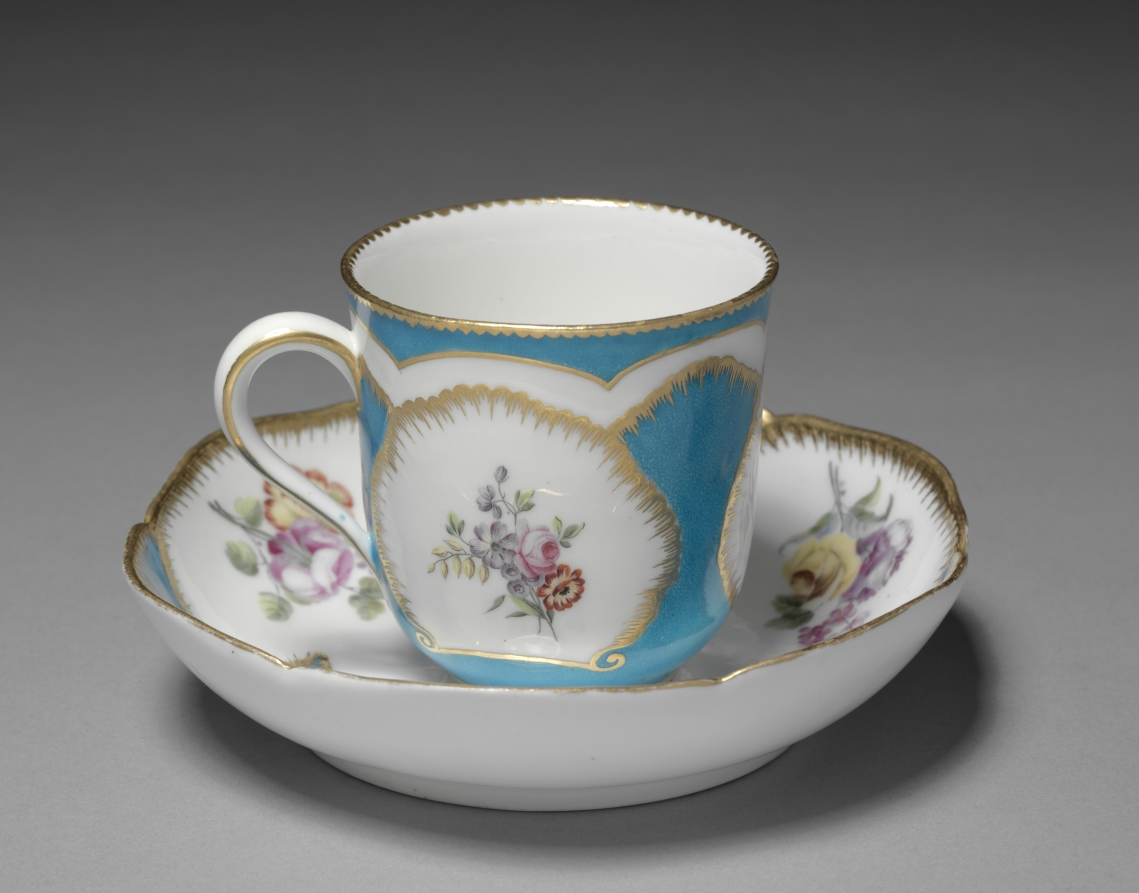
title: Cup and Saucer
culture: France, Sèvres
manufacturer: Sèvres Porcelain Factory (French, est. 1756)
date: 1759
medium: soft-paste porcelain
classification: Ceramic